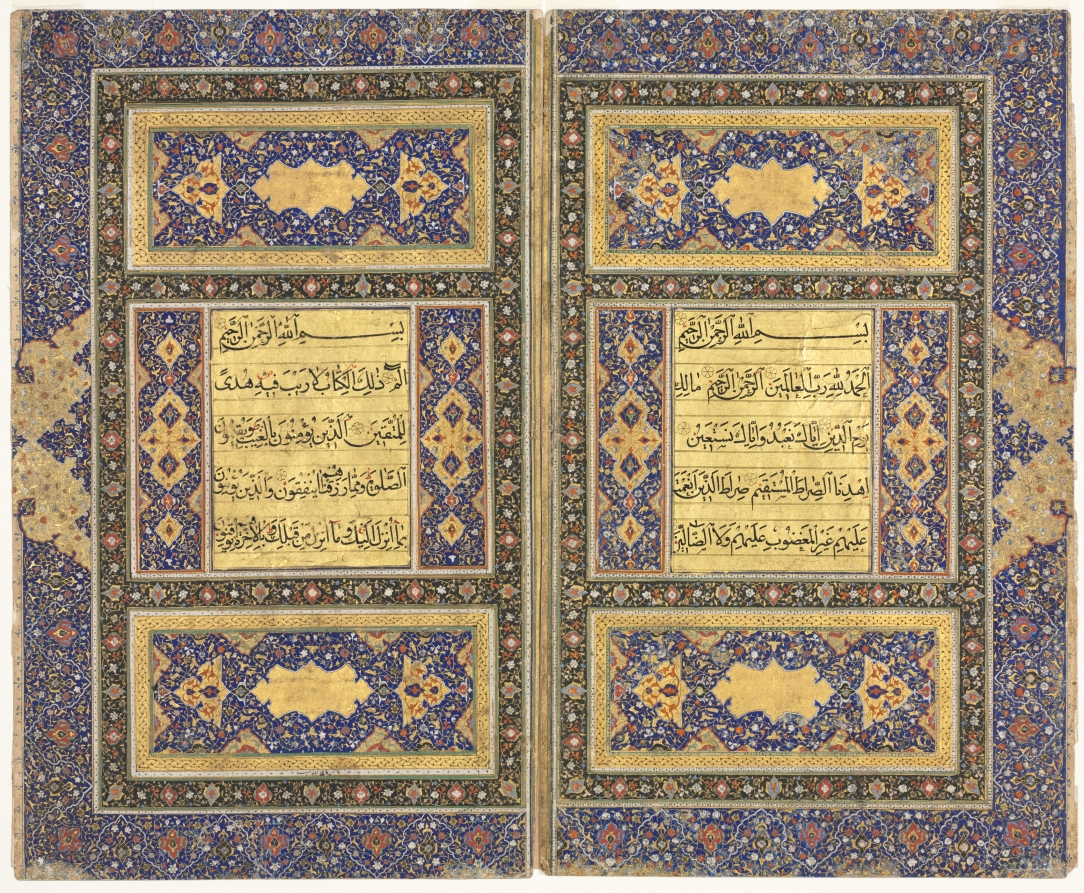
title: Qur'an Manuscript Folio (Verso); Right folio of Double-Page Illuminated Frontispiece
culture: Afghanistan, Herat, Safavid period (1501–1722)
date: 1500s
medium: ink, gold, and colors on paper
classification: Manuscript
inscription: Translation: Surah I: 1-7: In the Name of God, the Merciful, the Compassionate. Praise belongs to God, the Lord of all Being, the All merciful, the All-compassionate, the Master of the Day of Doom Thee only do we serve; to Thee alone do we pray for succour. Guide us in the straight path, the path of those whom Thou has blessed, not of those against whom Thou art wrathful, nor of those who are astray. Left folio (Surah II, 1-4) In the Name of God, the Merciful, the Compassionate. Alif Lam Mim That is the book, wherein is no doubt, a guidance to the godfearing who believe in the Unseen, and perform the prayer, and expend of that We have provided them; who believe in what has been sent down to thee and that had been sent down before thee, and have faith in the Hereafter; those are upon guidance from their Lord, those are the ones who prosper. Sura al-Fatiha [Chapter: The Opening] 1:1-7 (Arabic) Script: Naskhi (five lines to a page)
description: The Qur'an is the sacred book of Islam. In the view of orthodox Muslims, it is the literal word of God as revealed to the Prophet Muhammad (d. 632) in the Arabic language, and thus, recorded in the Arabic script. Because of its association with the divine word, Arabic calligraphy came to be a supreme art form in the Islamic world. As the quintessential symbol of the culture, it became a pervasive decorative element in Islamic art and architecture. Although secondary to calligraphy, a splendid tradition of illumination—that is, ornamentation with colors and gold—developed to enhance the pages of the Qur'an. Because of the prestige associated with the book arts in the Islamic world, the decorative motifs employed by illuminators (scrolling vines, blossoms, lozenges, and cartouches) found their way into other art forms, for example, metalwork, textiles, and carpets.